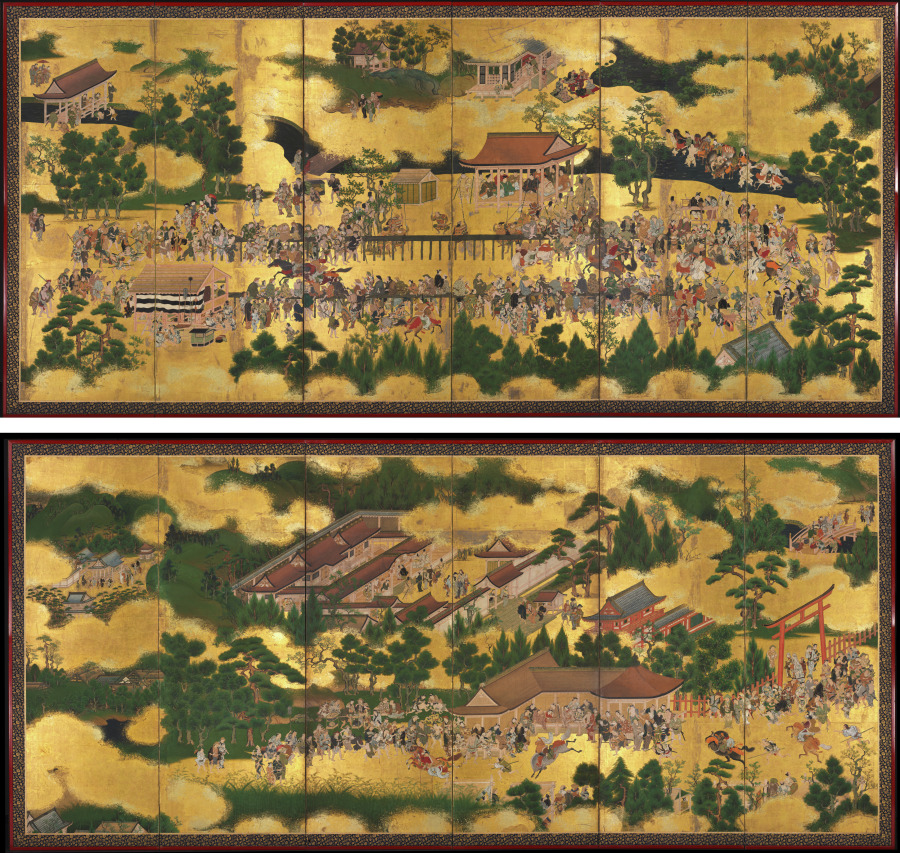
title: Horse Race at the Kamo Shrine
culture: Japan, Edo period (1615–1868)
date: early to mid-1600s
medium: Pair of six-panel folding screens; ink and color on gilded paper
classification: Painting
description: Here nearly 600 figures, engaged in a bewildering array of activities, have gathered at the Kamo Shrine in Kyoto for the horse race held annually on May 5 since at least the 800s. The entire populace seems to have turned out, apparent in the diversions and revelries spread out across these resplendent byøbu. The race begins on the right screen and continues far into the left along the lower half of the composition. Here the painter's genius for depicting engaging crowd scenes, a characteristic of Heian pictorial compositions, emerges in full force. The range of textile patterns alone is astonishing. The upper regions of the composition feature the shrine, its setting in northern Kyoto west of Lake Takaragaike, its architecture, and the visitors whose intentions range from casually mundane to spiritual. These paintings were originally part of a much larger pictorial narrative of linked murals in fusuma-e format. Four segments are known today from what must have been an extraordinary room of contiguous surfaces, executed by studio-trained but anonymous masters of yamato-e genre painting in Kyoto. The scale of the paintings and the quality of the materials indicate that they were commissioned by a sophisticated, wealthy patron.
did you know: The winner is decided by the distance between horses, not by which horse finished first.